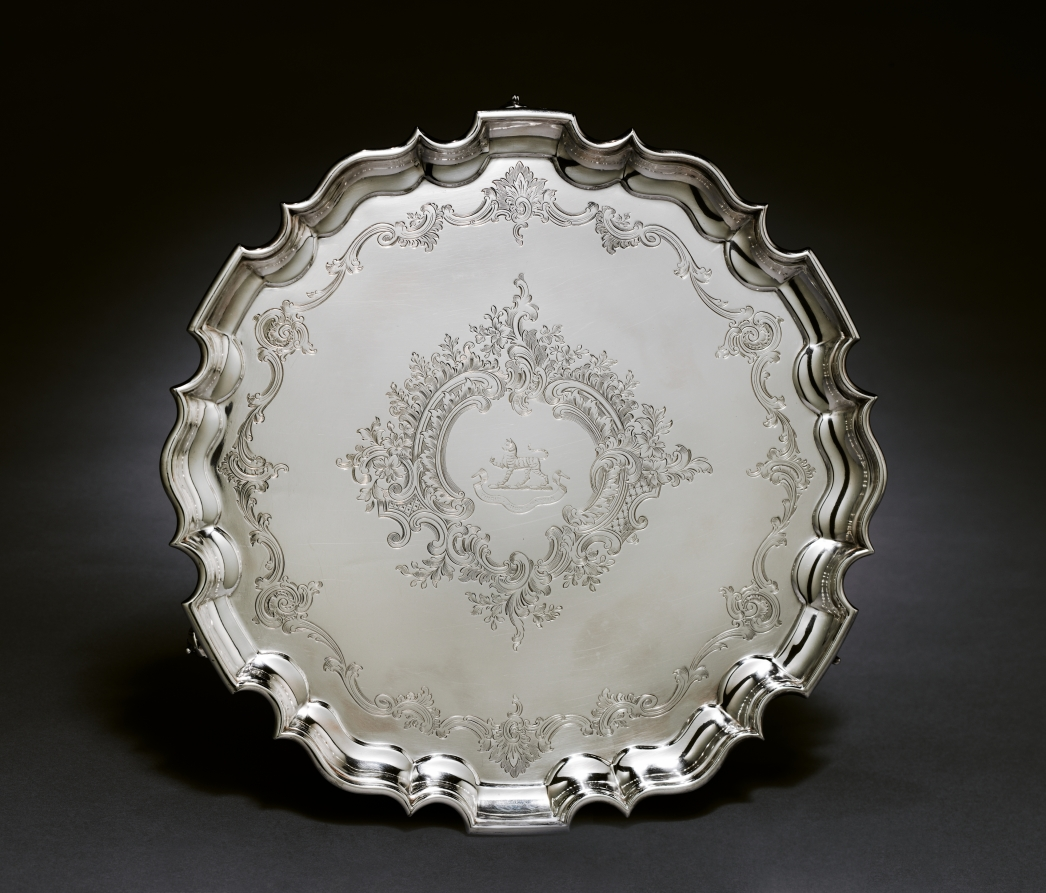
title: Salver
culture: England, London, 20th century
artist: Goldsmiths & Silversmiths Co. (British)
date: c. 1910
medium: silver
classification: Silver